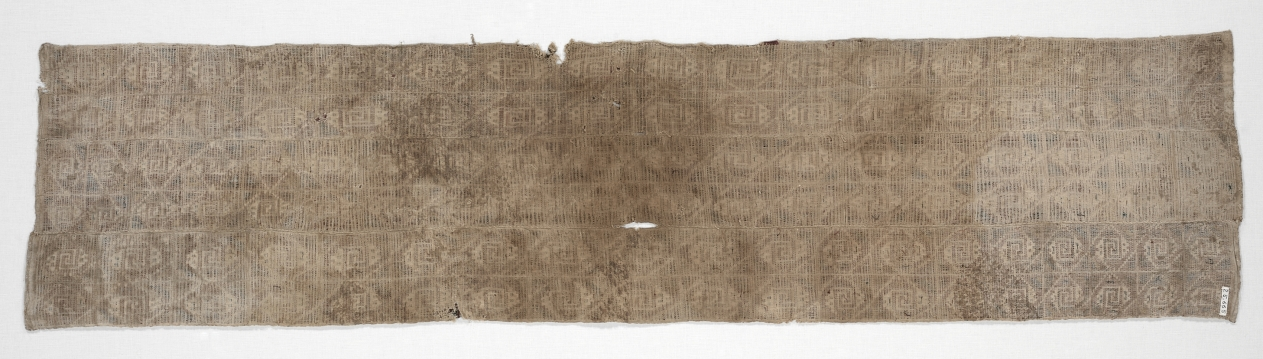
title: Large Cloth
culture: Peru, North Coast, Chimú Culture, 12th-15th century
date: c. 1100–1400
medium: plain cloth with overlaid tapestry-like decoration; cotton and wool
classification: Textile